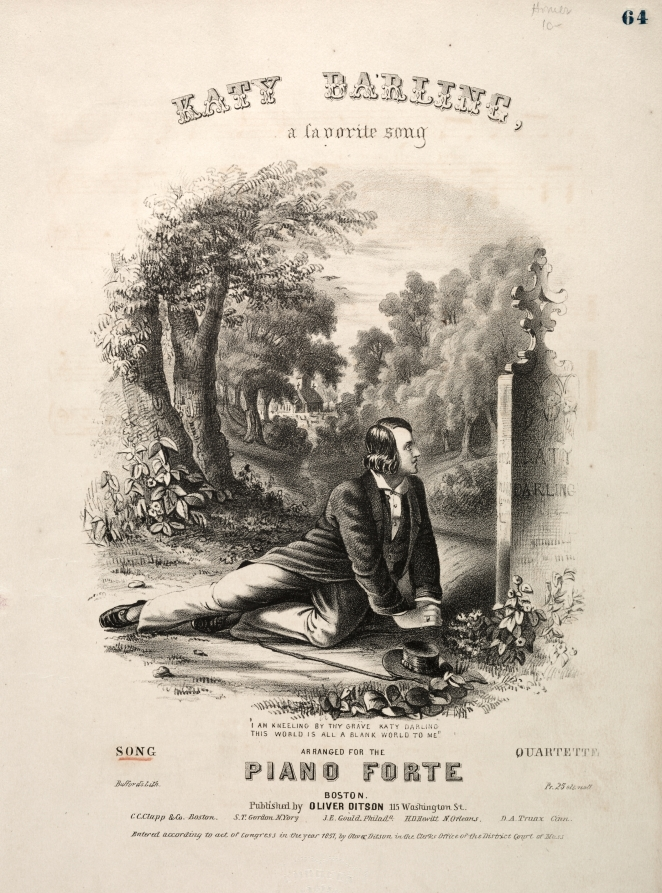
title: Katy Darling - Sheet Music Cover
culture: America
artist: Winslow Homer (American, 1836–1910)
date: c. 1857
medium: lithograph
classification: Print